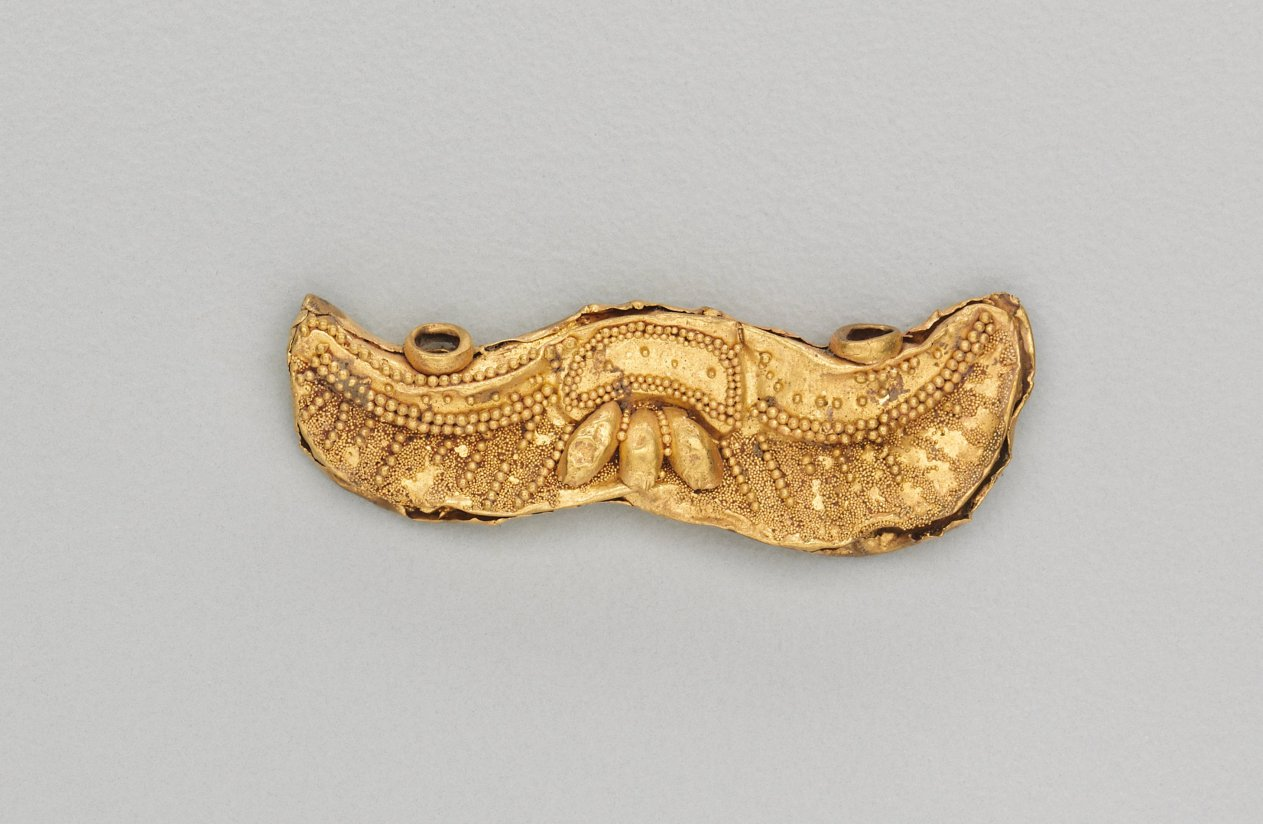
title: Set of Pendants Ending in a Bull's Head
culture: India, Shunga period (185–78 BCE)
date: 185–72 BCE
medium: gold repoussé with granulation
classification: Jewelry